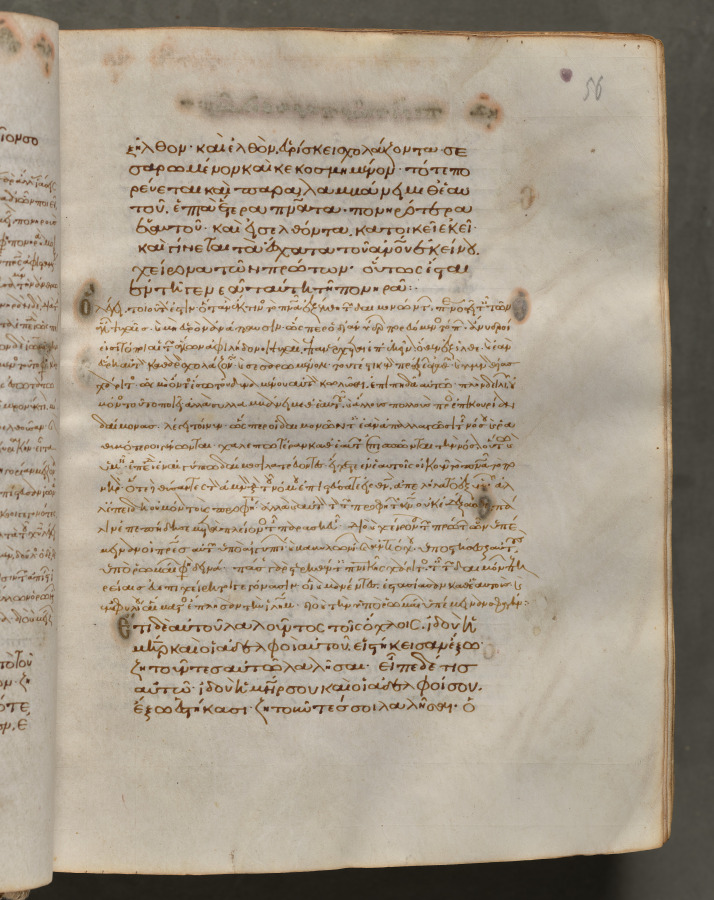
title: Text, folio 56 (recto), from a Gospel Book with Commentaries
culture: Byzantium, Constantinople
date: c. 1000–1100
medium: ink, tempera, and gold on vellum; leather binding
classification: Bound Volume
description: Each of the four gospels in this book opens on a page with brilliantly illuminated borders depicting the author of the text as well as birds-principally peacocks, symbols of the immortality of the soul-and fountains, representing the fountain of life and the salvation of the soul. This volume consists of 428 leaves with texts in Greek. Its level of sophistication suggests that it was probably written and decorated in a monastery in Constantinople.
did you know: Gospel Books were carried in procession through Byzantine churches.